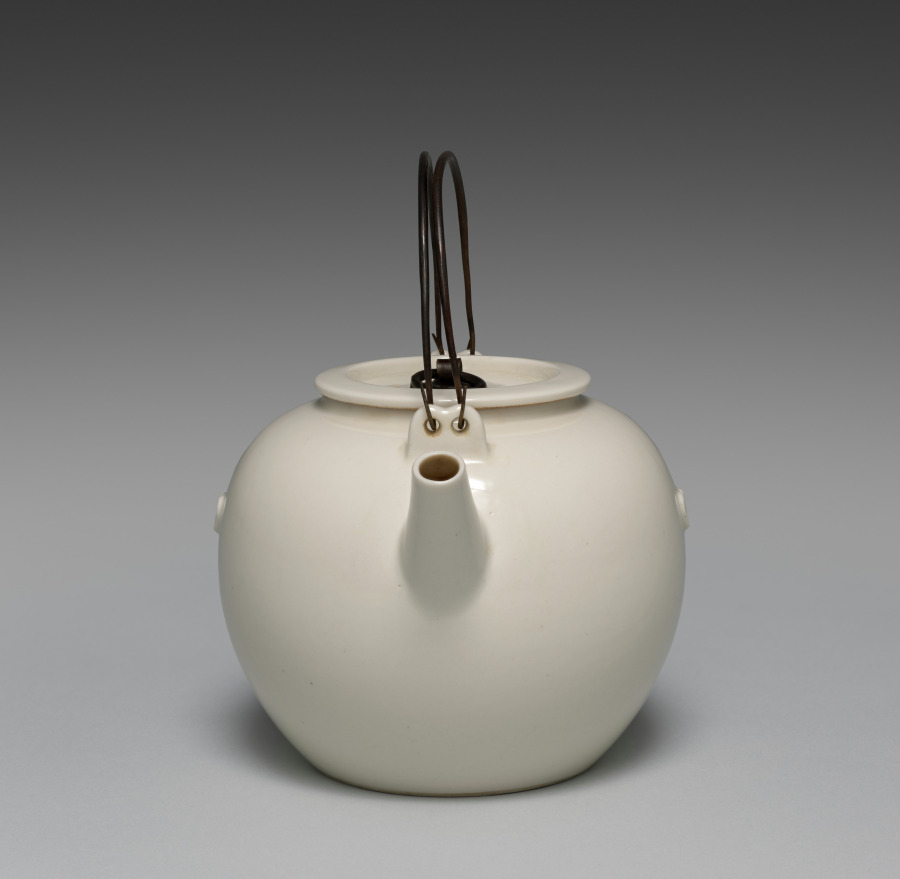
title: Teapot with Ruyi Motifs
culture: Japan, Meiji period (1868–1912)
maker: Seifū Yohei III (Japanese, 1851–1914)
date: 1893–1914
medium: Porcelain with molded design and iron handles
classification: Ceramic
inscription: The base of the pot has a “Seifu” seal.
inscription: Inscription on the box dated to 1960.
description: The simple, round form of this teapot is embellished with only a pair of nyoi staff-head motifs, one on each side. Two arched iron handles, parallel to each other, are hooked through holes in raised tabs at the front and back of the shoulders of the pot. The round lid is depressed so that an iron ring handle fastened with an iron clamp passing through the lid can lie flat inside the recessed area. The box is not original to the piece and has an inscription dated to 1960. The person who wrote it clearly admired Yohei III and his efforts to produce works that resembled Chinese ceramics. The inscription describes Yohei’s journey to perfecting these copies but misidentified the Chinese kiln whose wares were the basis for this particular work.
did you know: The base of the pot has a “Seifu” seal.